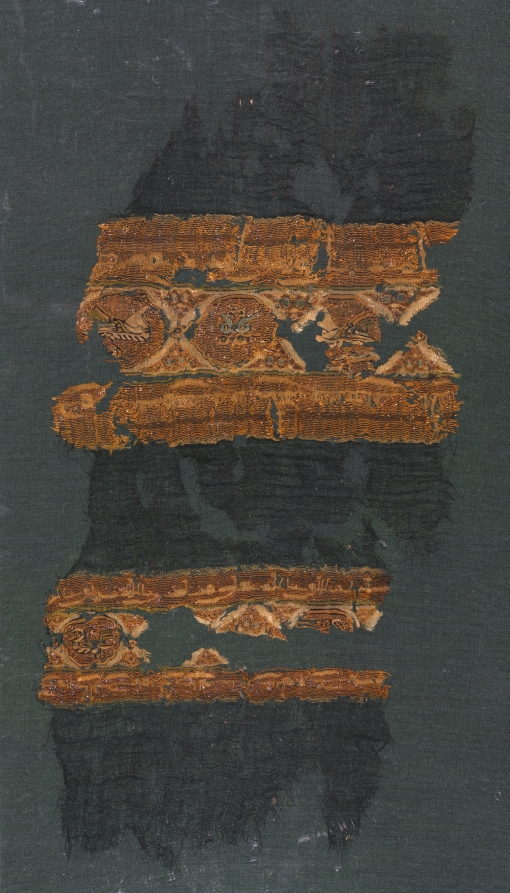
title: Tiraz with gold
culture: Egypt, Fatimid period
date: 1075–99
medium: plain weave with inwoven tapestry weave: linen, silk, and gold filé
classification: Textile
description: Gold thread forms the background of undecipherable texts and interlaced medallions in two tripartite bands woven with silk in slit-tapestry weave on a dark blue-green sharb linen ground. Sharb is a fine linen, which often formed the ground fabric for ṭirāz. Roosters, hens, and confronted chicks decorate the medallions.